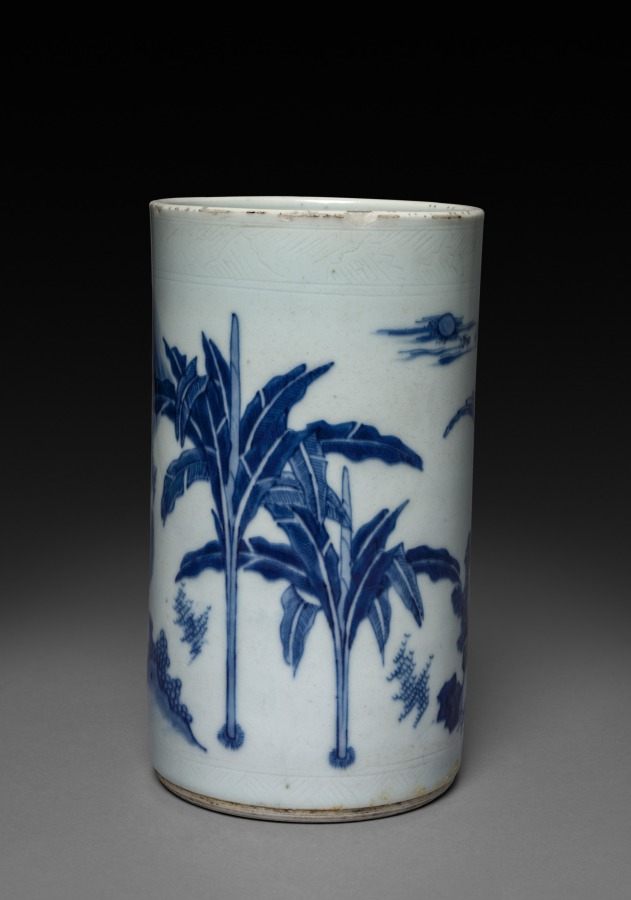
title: Brush Holder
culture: China, Jiangxi Province, Jingdezhen kilns, "Transitional period," Ming dynasty (1368–1644), Chongzhen reign (1628–1644)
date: 1628–44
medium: porcelain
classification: Ceramic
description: This porcelain brush holder is considered to have been made in the "Transitional period," a term used to define the period between about 1620 and 1683 when official kilns in Jingdezhen were no longer under imperial supervision due to the transition from the Ming to the Qing dynasties.